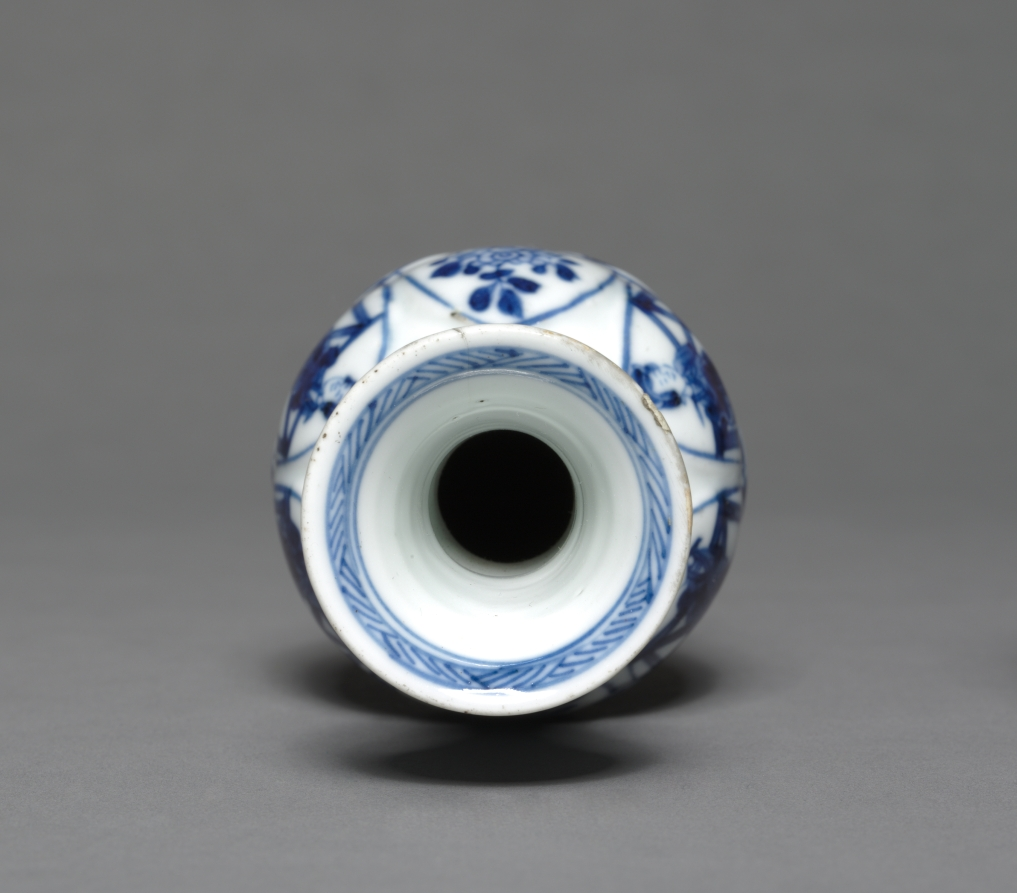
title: Vase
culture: China, Qing dynasty (1644-1911), Daoguang reign (1821-1850) - Xianfeng reign (1851-1861)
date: 19th Century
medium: porcelain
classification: Ceramic